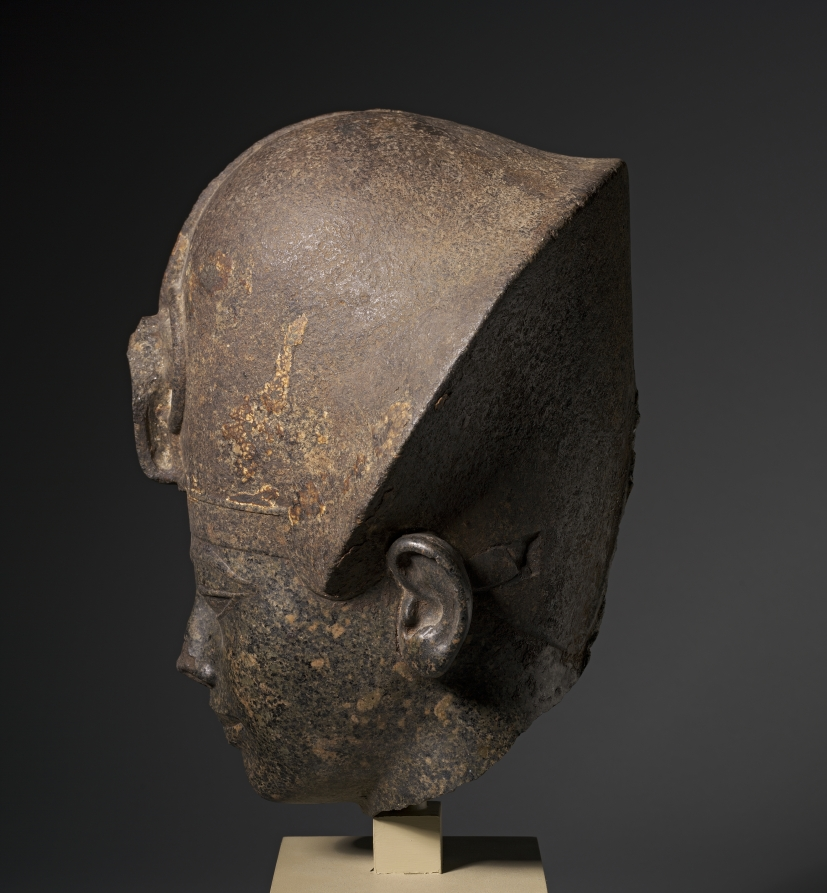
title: Head of Amenhotep III Wearing the Blue Crown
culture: Egypt, New Kingdom (1540–1069 BCE), Dynasty 18, reign of Amenhotep III (1390–1352 BCE)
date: c. 1391–1353 BCE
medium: granodiorite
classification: Sculpture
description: During the long, peaceful reign of Amenhotep III, Egypt reached a pinnacle of wealth and splendor. This magnificent portrait captures the ruler's exotic features to perfection. He has large, almond-shaped eyes, elegant arched eyebrows, and a full mouth. His face is youthful and without blemish. The bone structure is lost in the fleshy fullness of the face. The contrast between polished and roughened surfaces is a hallmark of hard stone images of Amenhotep III. The flesh areas were smoothed to a glistening sheen, while the eyeballs and the crown were left rougher. The roughening of the crown also had a practical purpose, for the upper portion was originally painted blue and the browband was painted yellow. The paint would have adhered better to the unpolished surface.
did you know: The Blue Crown or Khepresh was worn by New Kingdom Pharaohs into battle as well as in ceremonies.